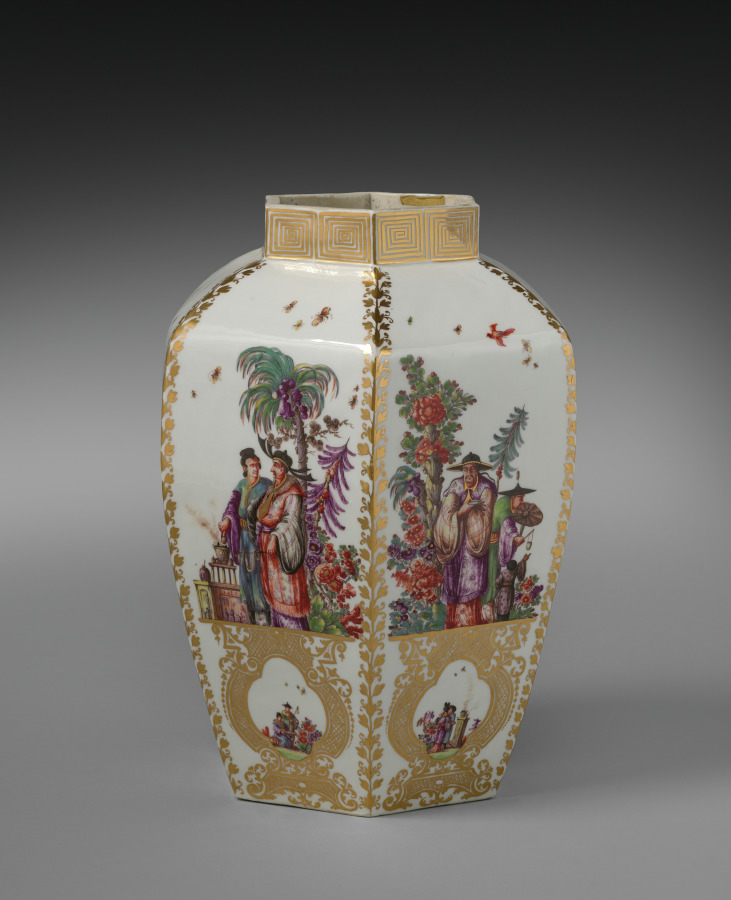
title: Vase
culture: Germany, Meissen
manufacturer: Meissen Porcelain Factory (German, est. c. 1710)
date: c. 1728–30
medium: porcelain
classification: Ceramic